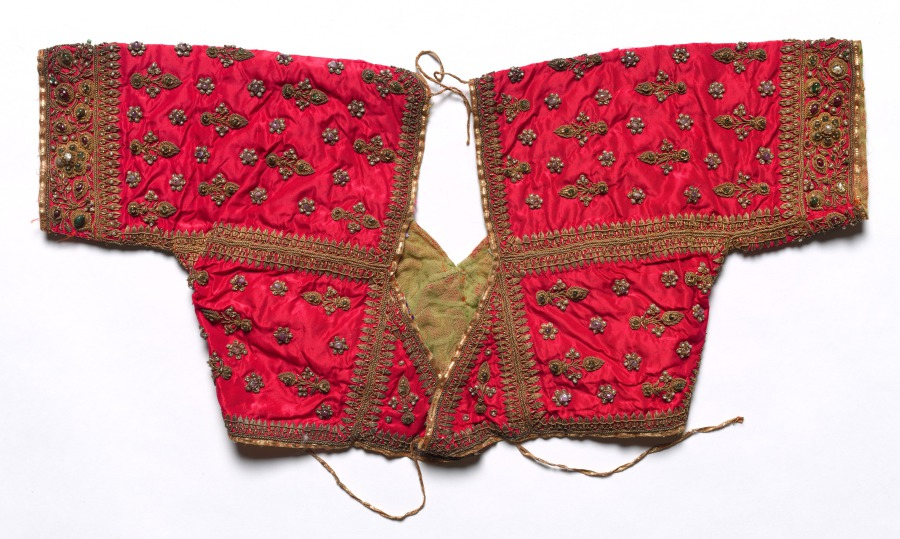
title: Child's Bodice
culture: India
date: early 1900s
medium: satin: embroidery decorated with gold thread, pearls, and glass beads(?)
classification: Garment